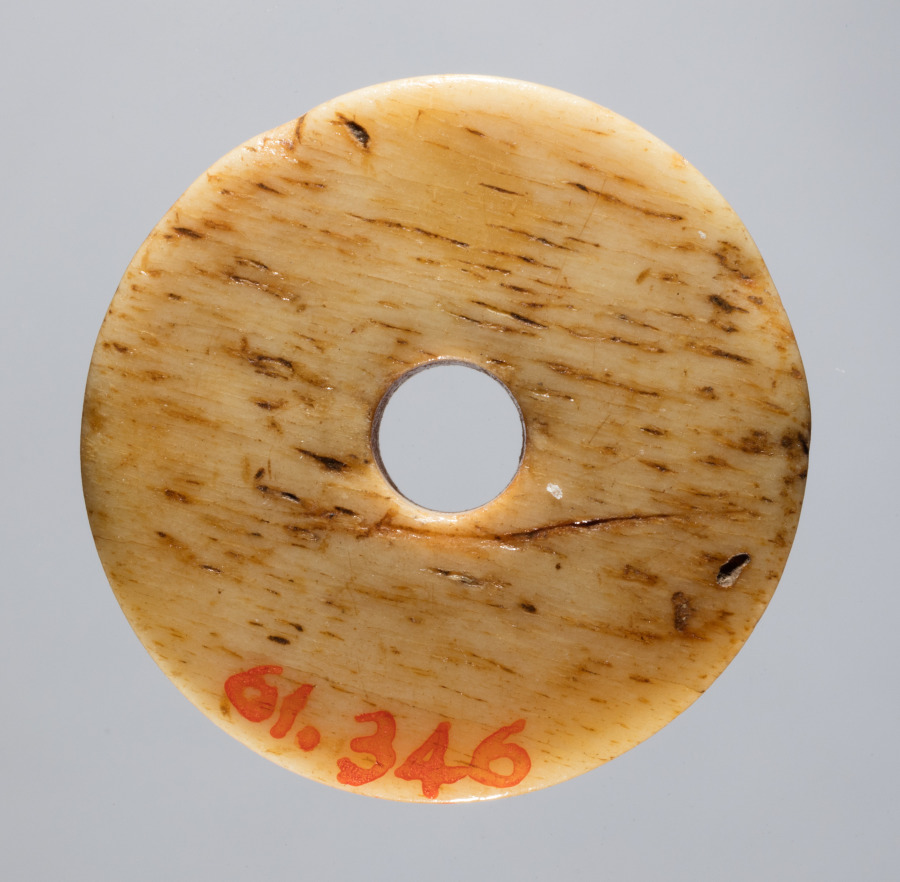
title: Spindle Whorl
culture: Iran, early Islamic period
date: 700s - 900s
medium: bone, incised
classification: Spindle Whorl